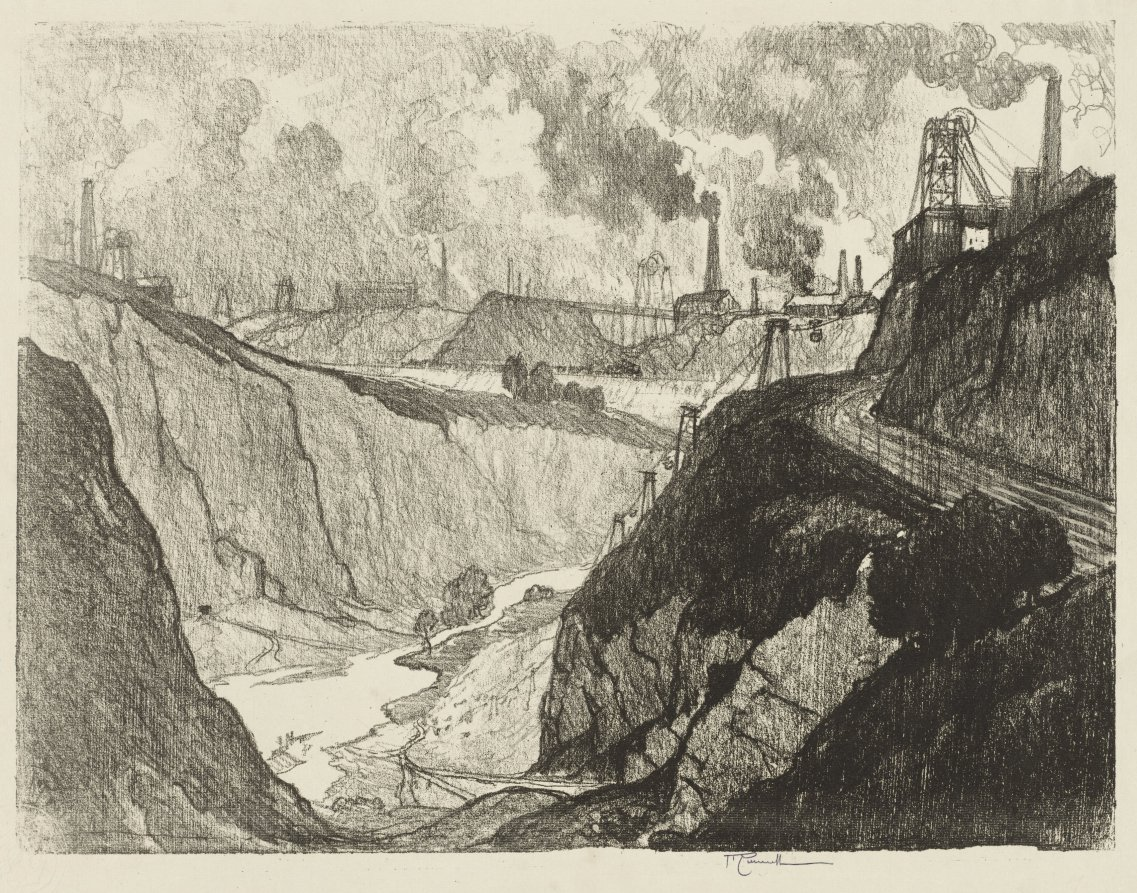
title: English War Work: The Iron Mine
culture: America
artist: Joseph Pennell (American, 1857–1926)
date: 1916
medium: lithograph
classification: Print